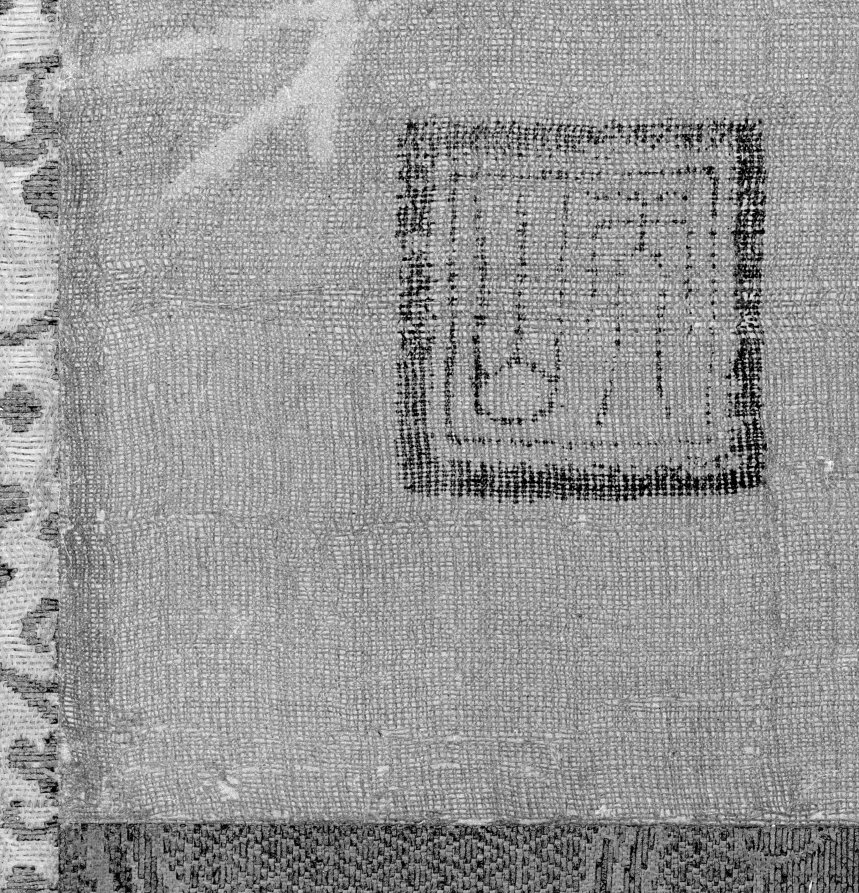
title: Tiger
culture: China, Southern Song dynasty (1127-1279)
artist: Fachang Muqi (Chinese, 1220–1280)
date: c. 1250–79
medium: Hanging scroll; ink and slight color on silk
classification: Painting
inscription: 道有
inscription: 雜華室印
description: The dragon and tiger are tied to the philosophical concept of yin and yang, which describes opposite but complementary forces. The dragon occupies a tiered background of waves and mist. Its luminous head emerges from the darker passages, and its narrow twisting body is serpent-like. By contrast, the close-up view of the tiger emphasizes its bulk. The tiger bends its head to lick its paw while its tail curls in the foreground. In their original Chan Buddhist context, this pair of scrolls likely flanked a central image, like the Bodhisattva Guanyin. The silk has darkened over the centuries, and the slight reddish shading in the tiger’s tongue and nose has faded.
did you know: Fachang Muqi's ink paintings, like this pair, were highly appreciated and collected in Japan.